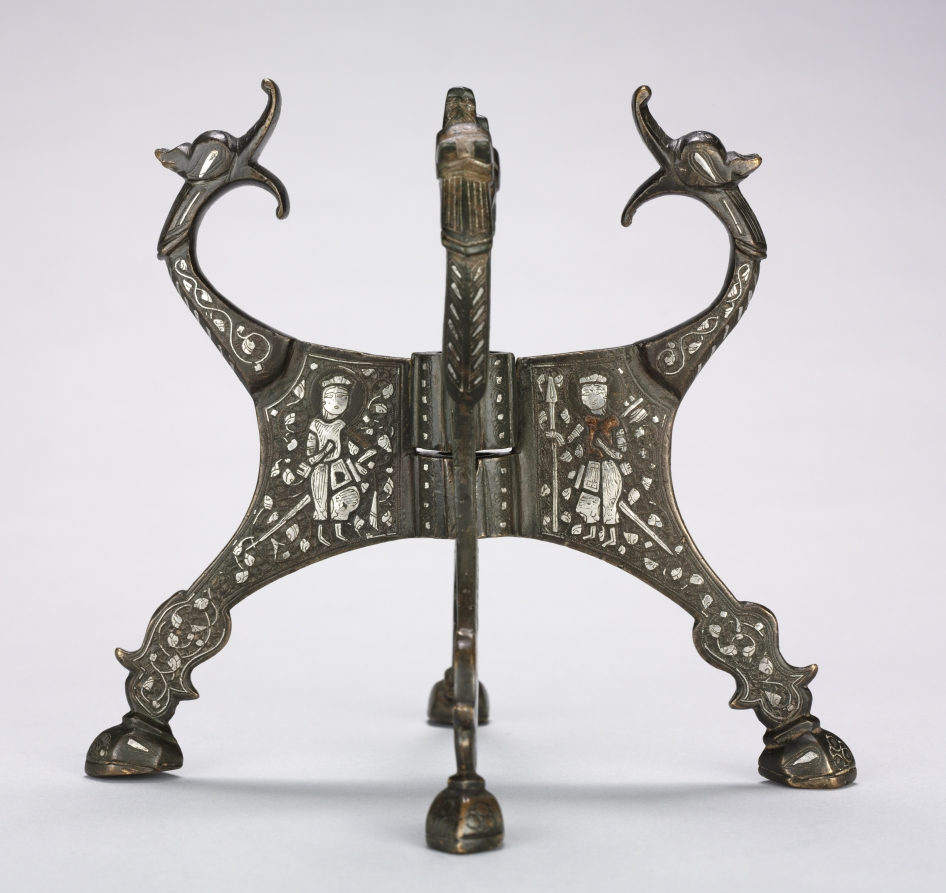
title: Dragon-headed Stand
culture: Northern Iraq or Syria, Zangid (1127–1251) or Ayyubid period (1171–1260)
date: 1200s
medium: cast brass inlaid with silver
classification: Metalwork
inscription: None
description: Themes of hunting and combat are evoked by this stand with gaping dragon heads and figures armed with swords and spears.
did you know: The four-legged stand has two interlocking parts.